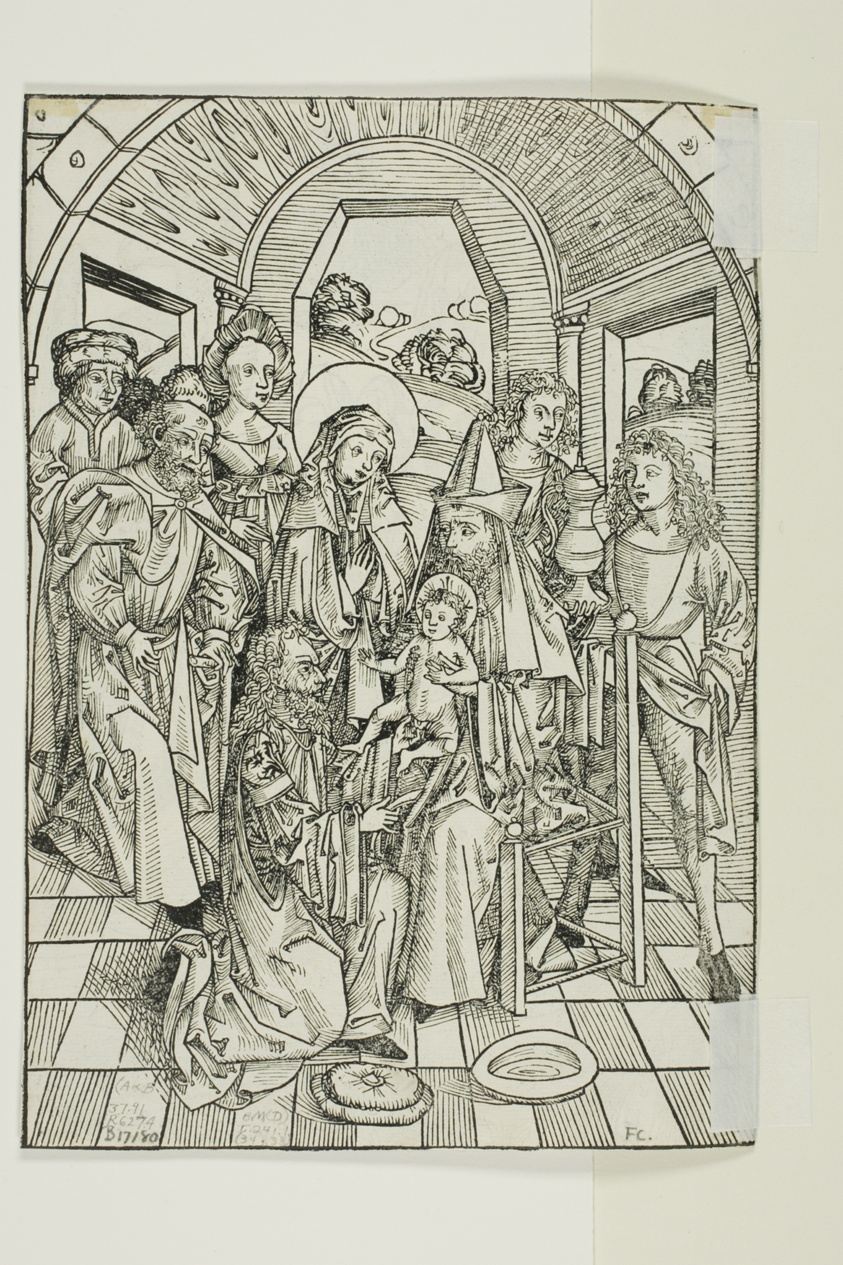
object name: Print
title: The Baptism of Christ (verso); The Circumcision of Christ (recto), pages 34 and 33, from the Treasury (Schatzbehalter)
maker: Michael Wolgemut and Workshop (German, 1434/37–1519); published by Anton Koberger (German, 1440–1513)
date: 1491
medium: Woodcut in black on ivory laid paper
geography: Germany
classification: woodcut; print; prints and drawing